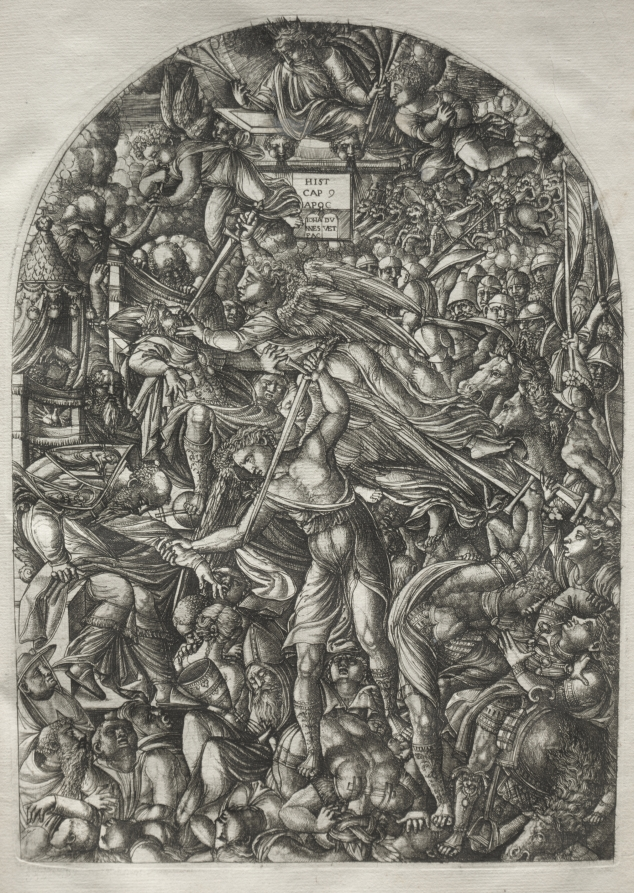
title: The Apocalypse: The Angel Sounding the Sixth Trumpet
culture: France, 16th century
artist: Jean Duvet (French, 1485–1561)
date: 1546–1556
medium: engraving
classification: Print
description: This print is part of a bound volume of works illustrating the a narrative of the Apocalypse, taken from the Revelation of Saint John in the Bible. The 23 engravings in the series occupied the artist for a number of years and represent his greatest artistic achievement. The museum's volume is one of only seven known complete sets. Jean Duvet was one of the first major printmakers in France and one of the most original artists of the 1500s. Although he worked mostly in the provincial city of Langres, he became aware of Italian art through the circulation of prints—notably those of Marcantonio Raimondi. His solidly modeled human figures reflect the influence of the Italian High Renaissance. Duvet, however, developed an idiosyncratic, highly artificial style with crowded compositions that ignore rational space in favor of ornamental surface patterns.